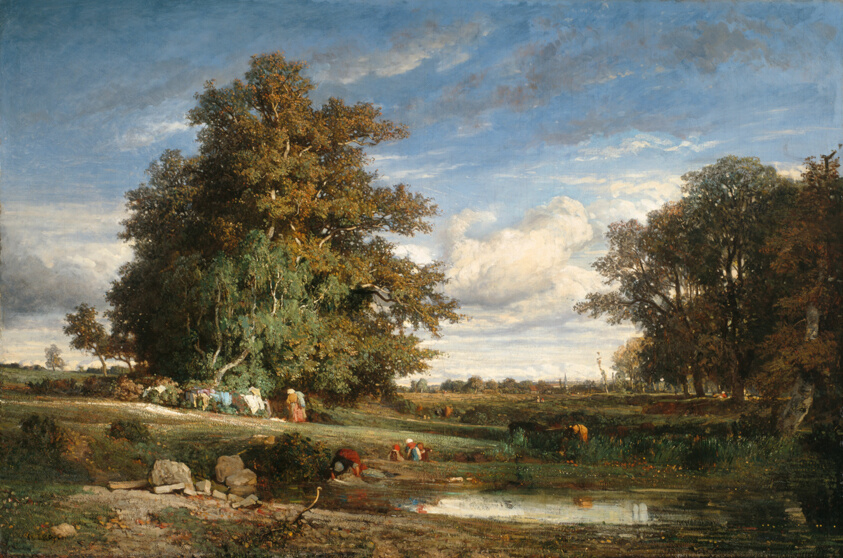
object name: Painting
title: The Marsh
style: nineteenth century, 19th century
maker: Constant Troyon (French, 1810–1865)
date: 1840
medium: Oil on canvas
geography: France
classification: oil on canvas; french; paint; oil paintings (visual works); painting; european painting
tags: landscape, water, trees, sky, rural life, rocks, nature, landscapes, labor, green (color), figures, clouds, clothes, children, bushes, blue (color), blue